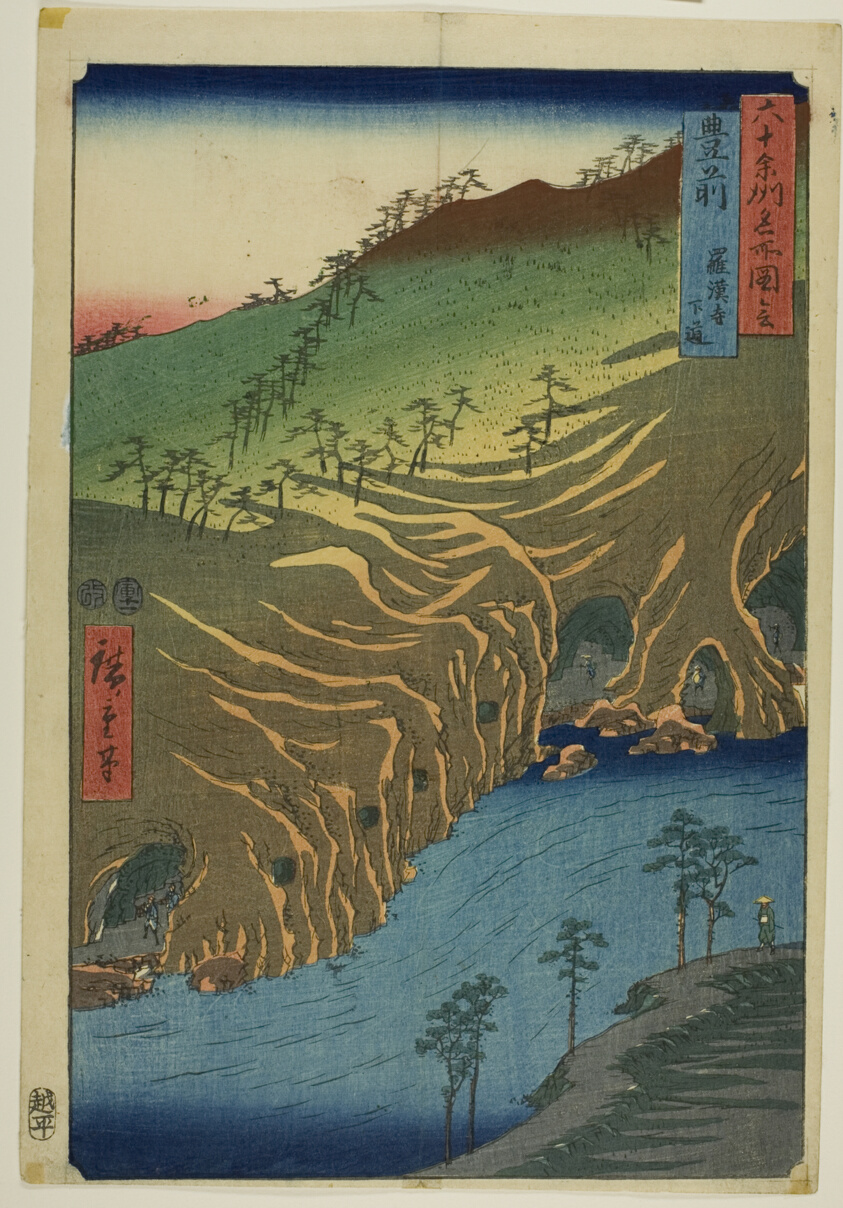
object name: Print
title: The Road Below the Rakan Temple in Buzen Province, from the series “Fifty-Three Stations of the Tokaido”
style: Japanese (culture or style)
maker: Utagawa Hiroshige 歌川 広重; Japanese, 1797–1858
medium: Color woodblock print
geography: Japan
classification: woodblock print; print